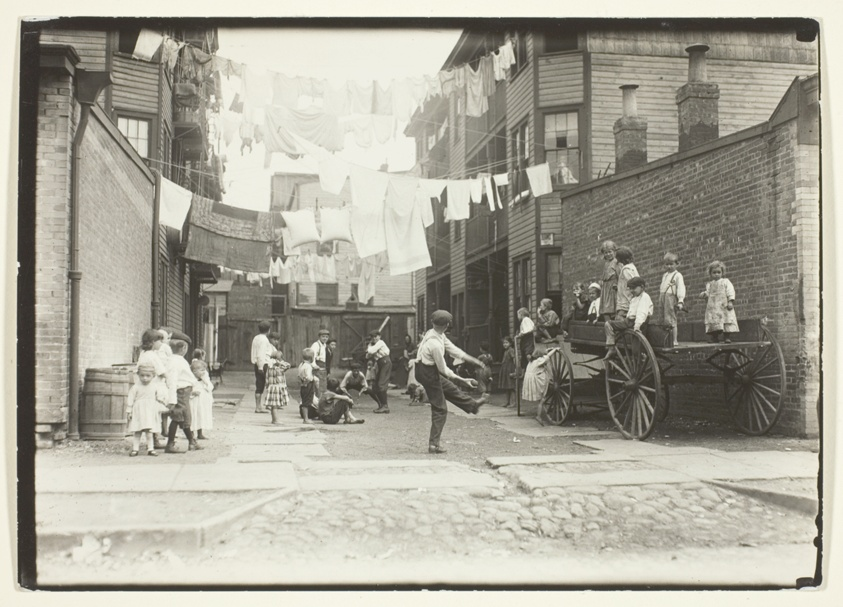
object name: Photograph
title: Playground in a Mill Village (Playground in a Tenement Alley), Boston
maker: Lewis Wickes Hine (American, 1874–1940)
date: 1909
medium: Gelatin silver print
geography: United States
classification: gelatin silver (developing-out-paper) pr; photographic process; photography; photograph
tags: Collected by Hugh Edwards